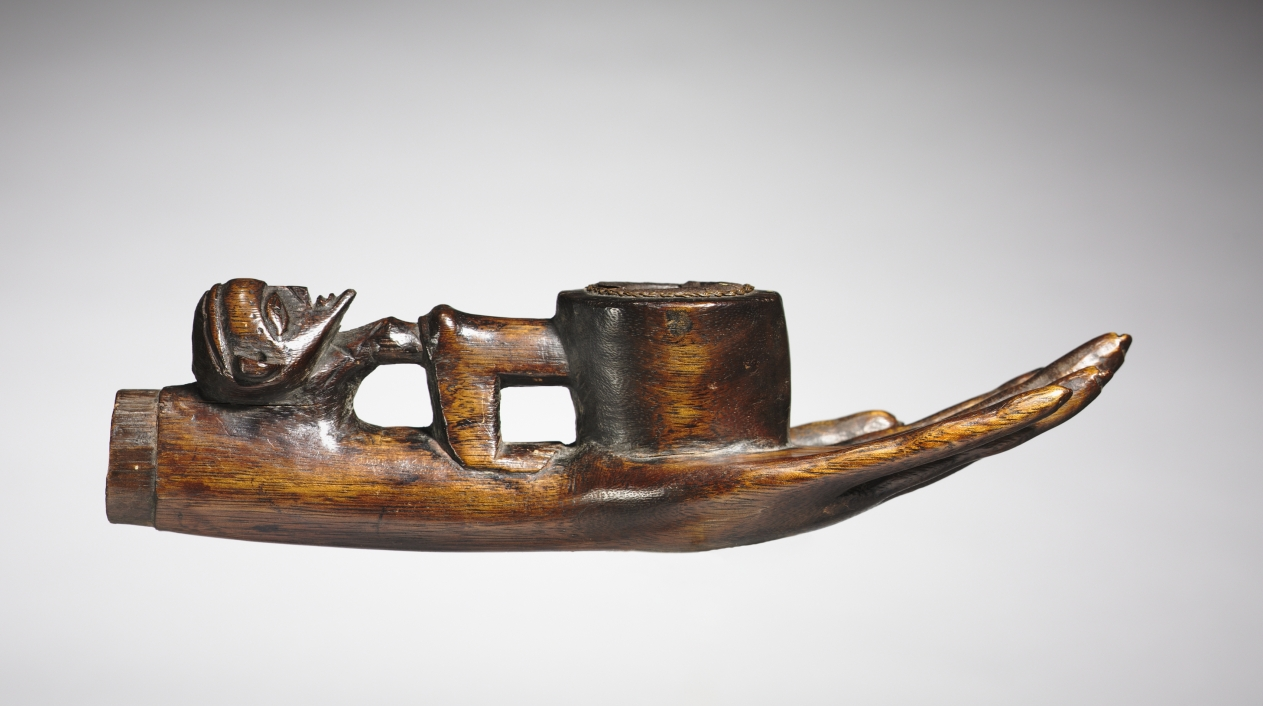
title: Pipe bowl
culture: Africa, Central Africa, Democratic Republic of Congo, Luluwa or Luntu maker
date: early to mid-1900s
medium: Wood, iron, and copper alloy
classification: Implements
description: Tobacco smoking had important social connotations in Central Africa, denoting age, status, and gender. Perhaps the enlarged hand expressed physical and spiritual powers and indicates that this work belonged to a chief. Figuratively carved pipes and snuff mortars constitute important genres of Luluwa decorative arts. As personal objects reflecting the prominence and success of their male and sometimes female owners, they are usually the creative work of virtuoso artists and take a variety of often imaginative shapes.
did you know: The cavity for the tobacco is positioned in the belly of a figure who holds himself up with bent arms on the pipe.